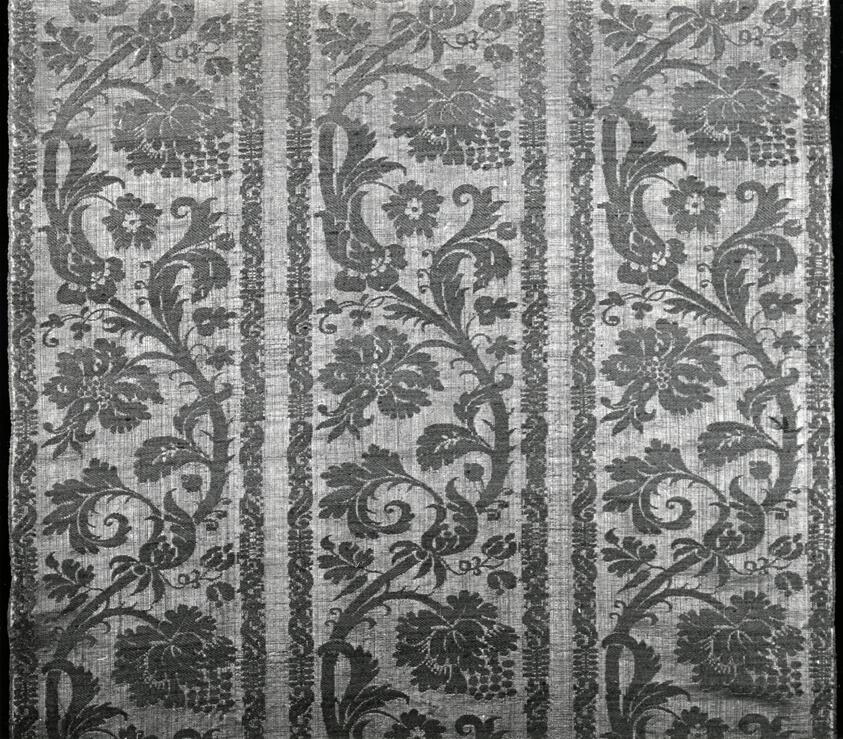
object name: Textile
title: Panel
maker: Spain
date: 17th century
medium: Silk and linen, warp-float faced satin weave self-patterned by areas of twill interlacing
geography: Spain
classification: textile; weaving